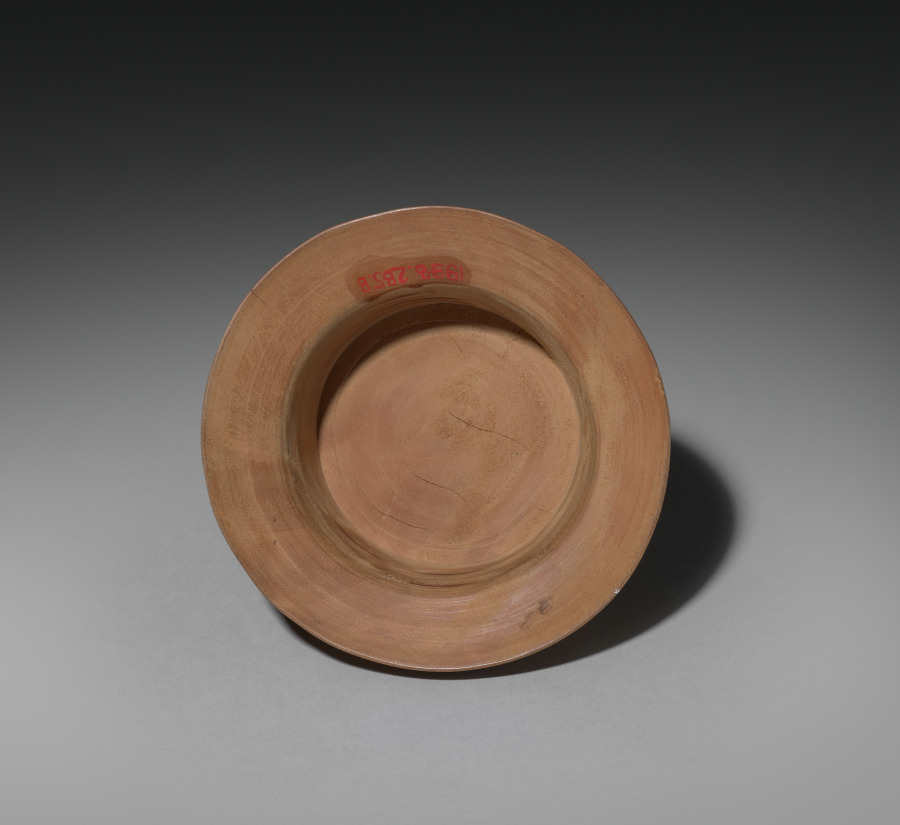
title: Covered Jar (lid)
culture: Vietnam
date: 1500s–1600s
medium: stoneware with blue and white decoration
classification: Ceramic